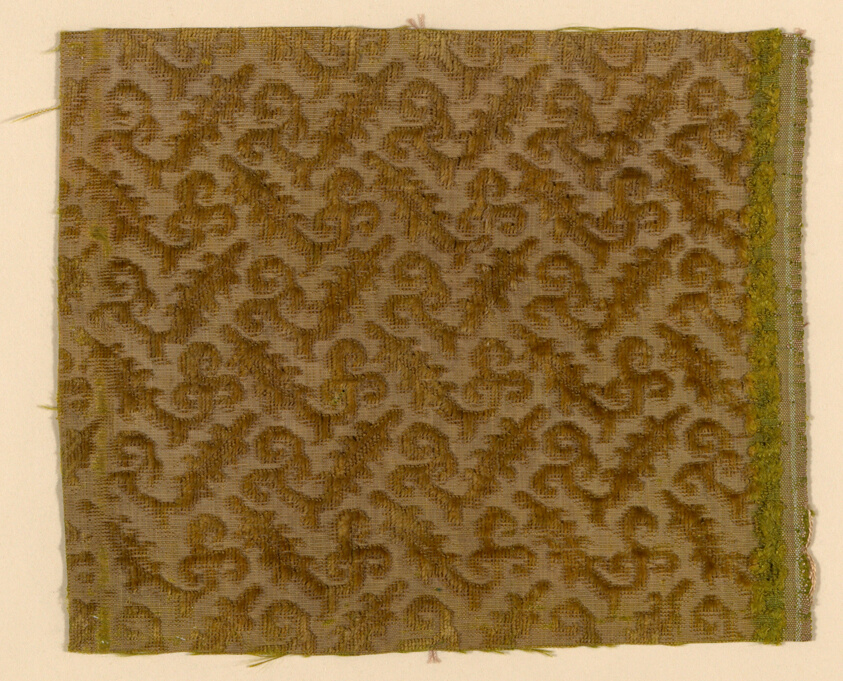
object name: Textile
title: Fragment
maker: Italy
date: 1600/50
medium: Silk, plain weave with supplementary pile warps forming cut and uncut voided velvet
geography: Italy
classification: textile; weaving - velvet; weaving